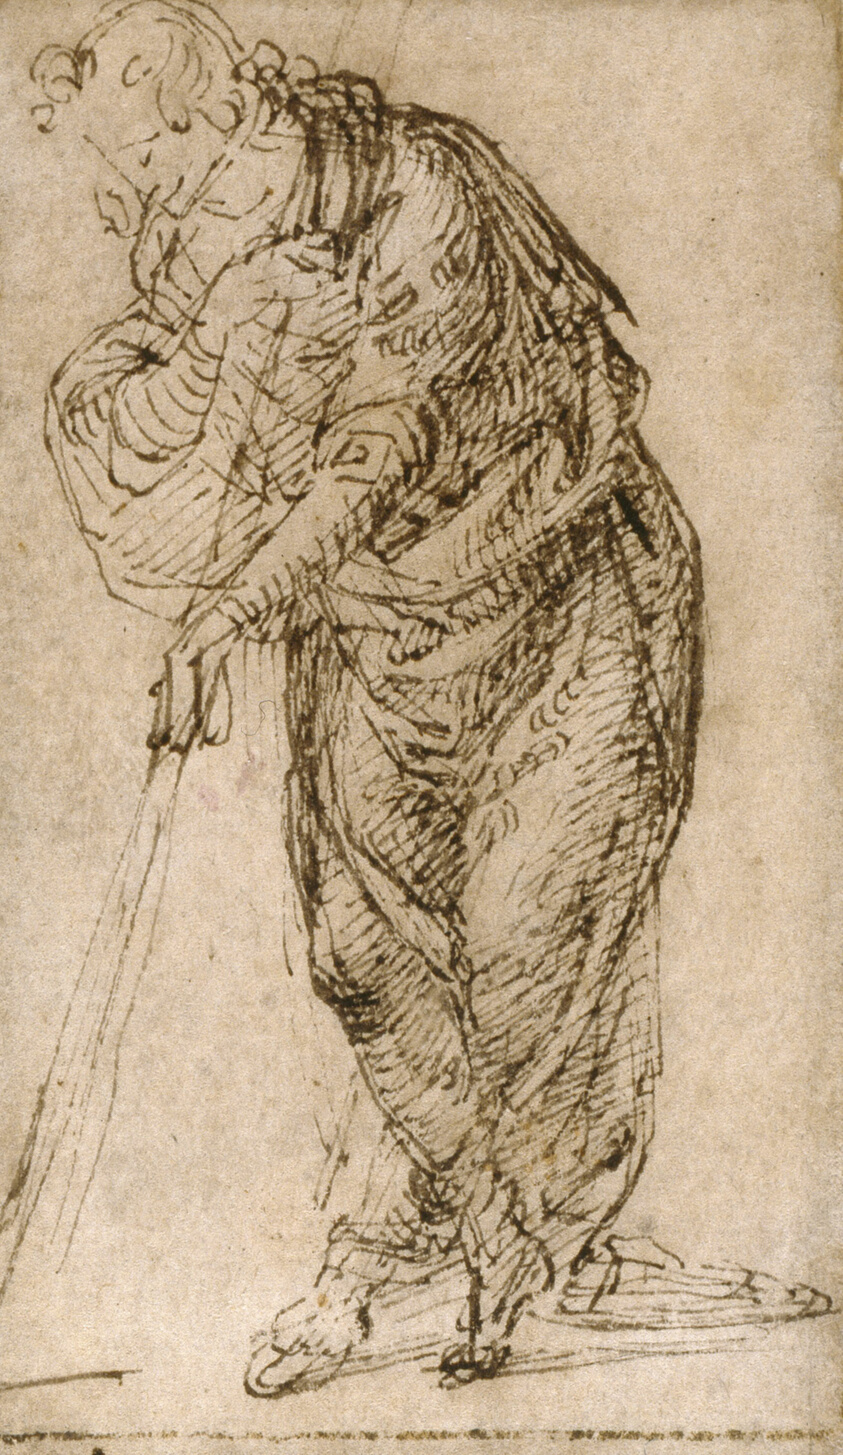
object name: Drawing and Watercolor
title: Standing Figure Leaning on a Staff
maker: Piero di Cosimo (Italian, 1462-1521)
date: c. 1510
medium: Pen and brown ink on tan laid paper, edge-mounted to cream wove paper; framing lines in pen and brown ink on all four sides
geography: Italy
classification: pen and ink drawings; drawings (visual works); prints and drawing